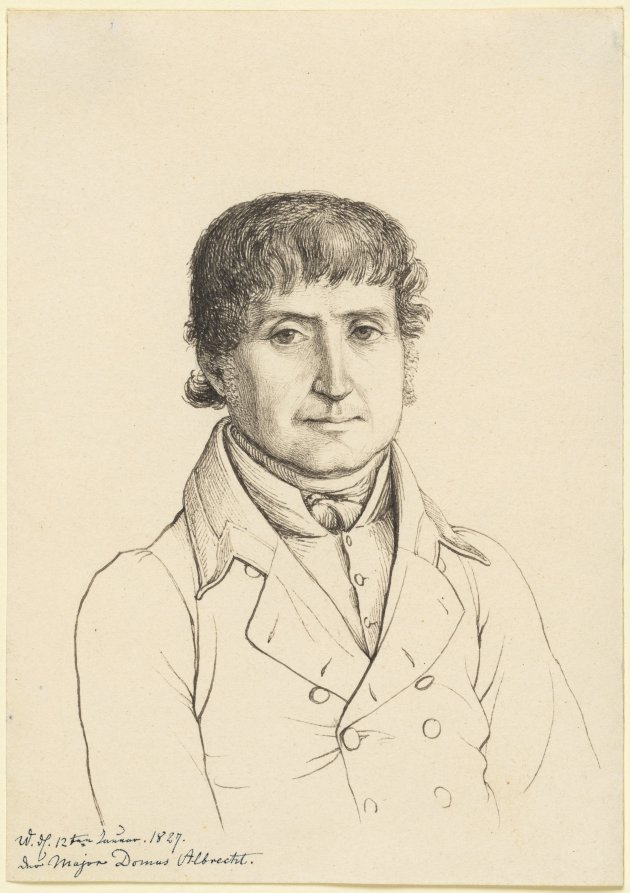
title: Majordomo Albrecht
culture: Germany, 19th century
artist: Gerhard Wilhelm von Reutern (German, 1794–1865)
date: 1827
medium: pen and gray and black ink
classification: Drawing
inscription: signed, lower left, in black ink: W. R. 12ten Januar. 1827. / Der Major Domus Albrecht. ; VERSO, upper left, in graphite?: 6